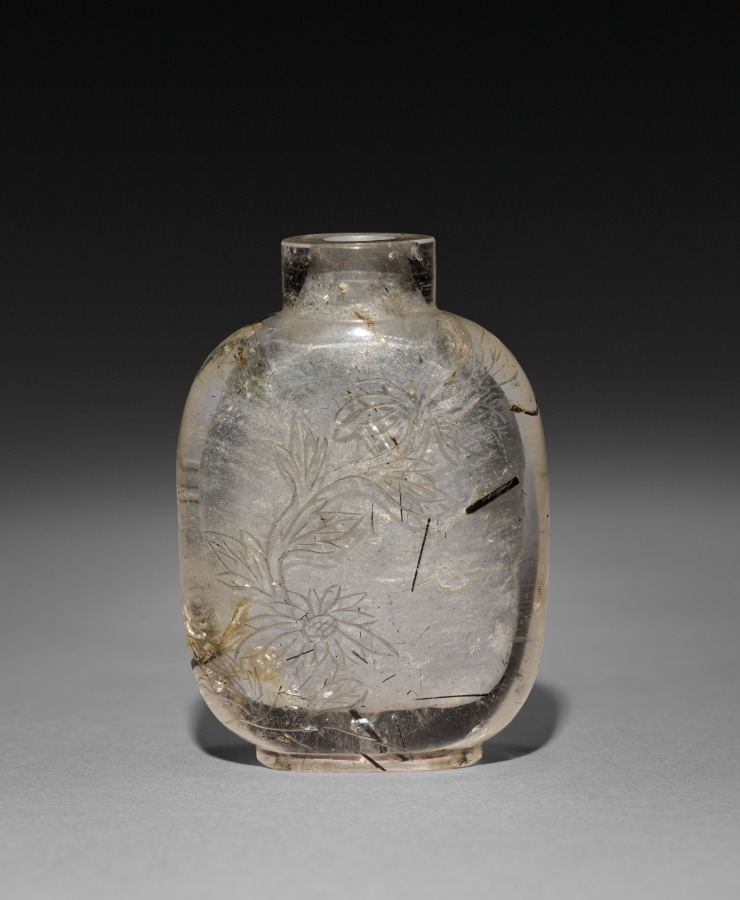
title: Snuff Bottle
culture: China, Qing dynasty (1644-1911)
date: 1644–1911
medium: glass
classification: Glass